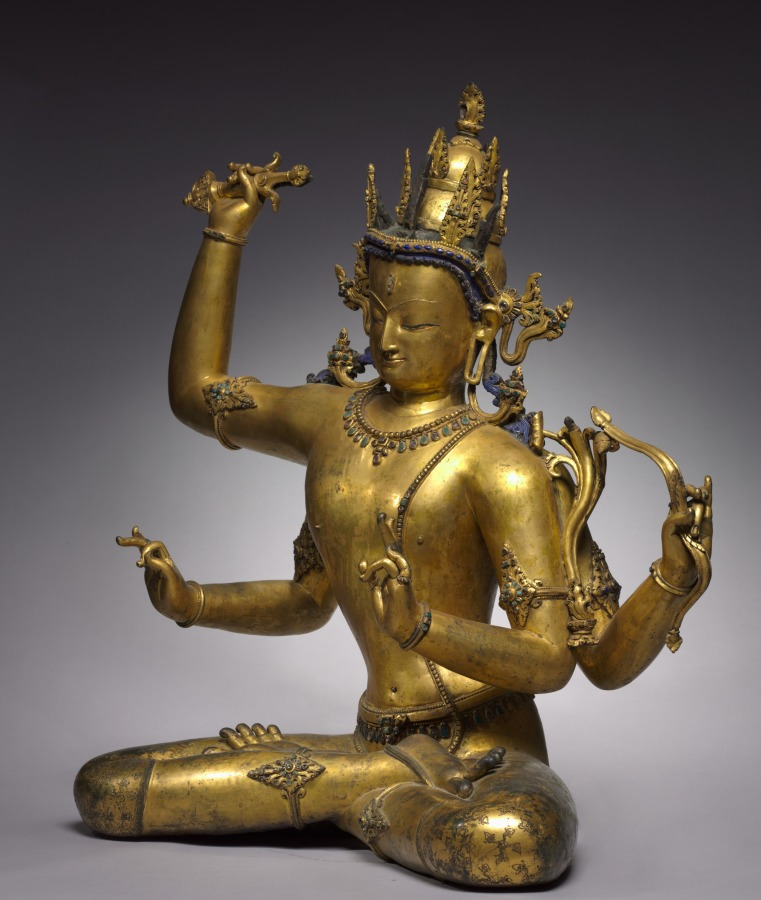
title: Bodhisattva of Wisdom (Manjushri)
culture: Nepal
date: 1400s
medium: Gilt bronze with precious and semiprecious stones, gum tempera, and cold gold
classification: Sculpture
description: This image depicts one of the main bodhisattvas, beings only one stage away from full enlightenment. Because the historical Buddha was a prince prior to his renunciation and life as a wandering ascetic, bodhisattvas are depicted as royal princes. This example has the sharp features, sweet expression, and crisp details characteristic of images made in Nepal during the 1400s. In his upraised right hand Manjushri holds the hilt of a sword that, like wisdom itself, metaphorically cuts through and defeats ignorance. His lower, rear left hand grasps a bow, once probably strung with a wire. Also missing is the arrow that he likely held in his lowered right hand. Arrows were often symbols for mantras, or strings of syllables thought to have the power to focus the mind and work like missiles to destroy negativity and affliction. The gesture of his lowered left hand indicates the transmission of Buddhist teachings. The lotus stem that rises at the left elbows originally held a book of sutras. This figure is in the yogic posture of meditation with the big toe flexed in concentration. Yoga is of central importance in tantric Buddhism, because high-level practitioners are able to discipline the body to such an extent that the mind can also be controlled.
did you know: The bodhisattva's short breeches are patterned in spiraling floral forms incised into the metal.